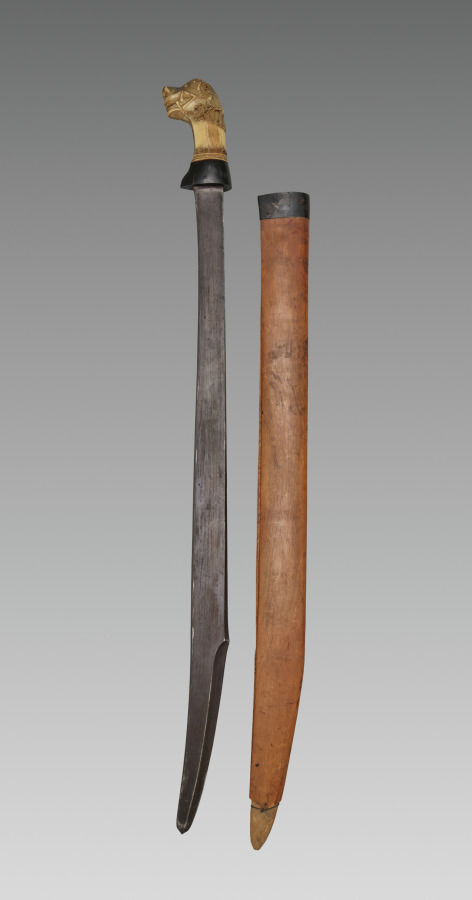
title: Sword and Scabbard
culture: Java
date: 1700s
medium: steel and ivory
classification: Arms and Armor